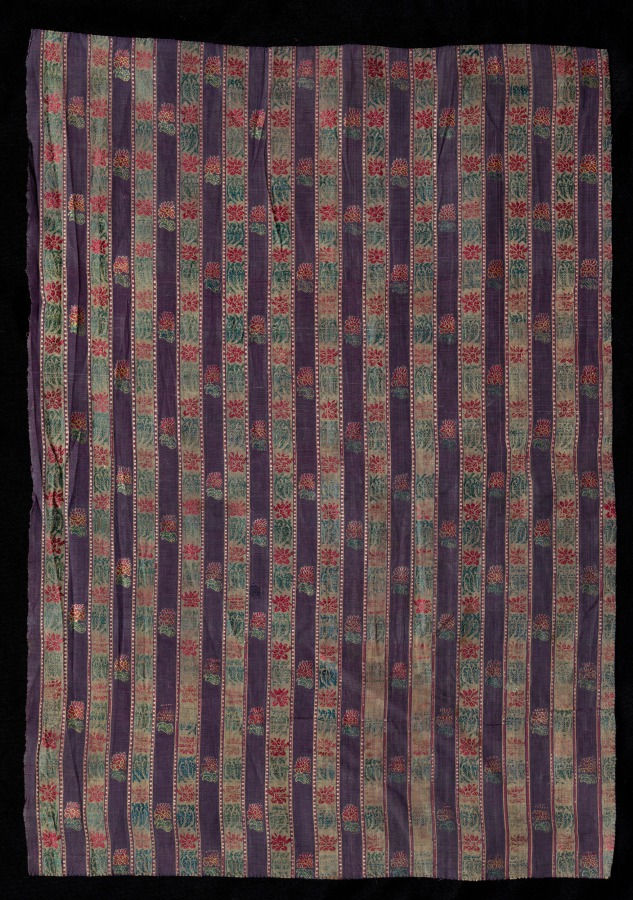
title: Striped Brocade with Flowering Plants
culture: Western India, Surat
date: 1700s or 1800s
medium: Cotton and silk: brocade, “himru”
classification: Textile